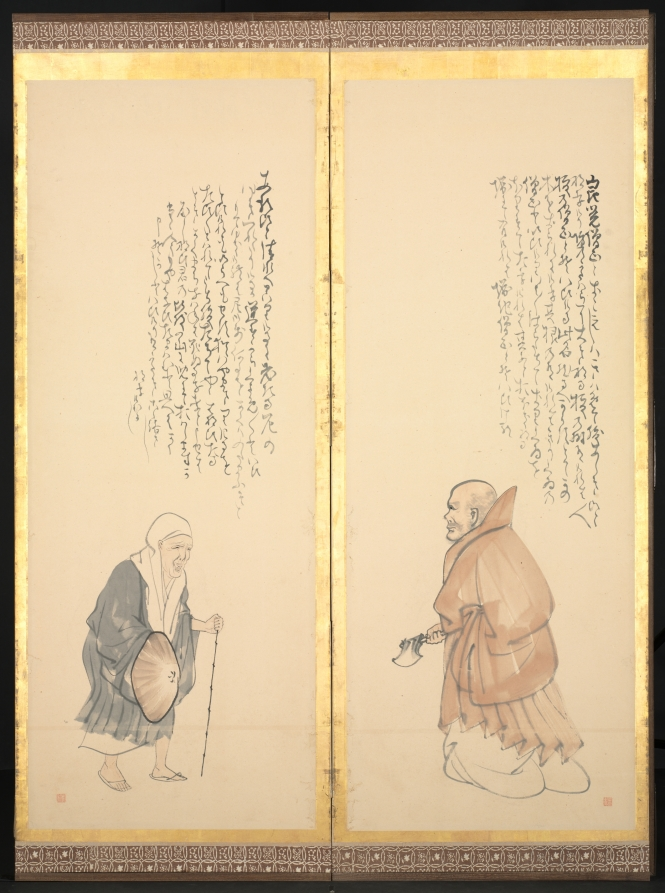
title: Scenes from Essays in Idleness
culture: Japan, Edo period (1615–1868)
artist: Matsumura Goshun (Japanese, 1752–1811)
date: late 1700s–early 1800s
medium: One of a pair of six-panel folding screens; ink and color on paper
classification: Painting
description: Matsumura Goshun inscribed passages from Buddhist monk Yoshida Kenkō’s (1283–1350) well-known collection of anecdotes, Essays in Idleness, across the top of the panels of this screen and its pair. Goshun illustrated the narratives with his vision of the figures who feature in them. The texts cascade down from right to left, forming unique compositional relationships with the images below. The episodes offer a veritable portrait of human idiosyncrasy, from one man’s deep faith in radishes to another’s inability to avoid nicknames.